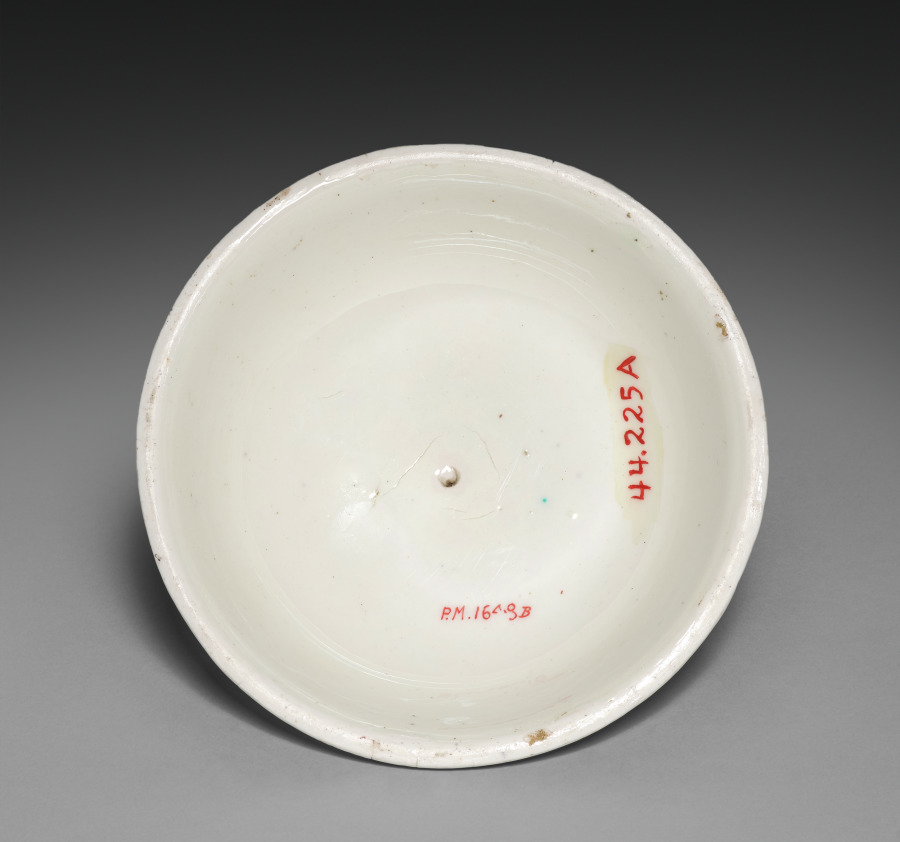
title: Cover for a Sugar Bowl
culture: France, Vincennes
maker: Vincennes Porcelain Manufactory (French, 1740–1756)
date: 1745–48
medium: soft-paste porcelain with enamel decoration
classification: Ceramic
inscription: In red on interior of lid: P.M. 16 4.8B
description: This covered bowl is one of the earliest surviving examples of Vincennes porcelain. Its decorations, particularly the lacy borders, show the influence of Meissen porcelain, but an individual note is struck in the extreme delicacy and colorful restraint of the painting of the landscape scenes.